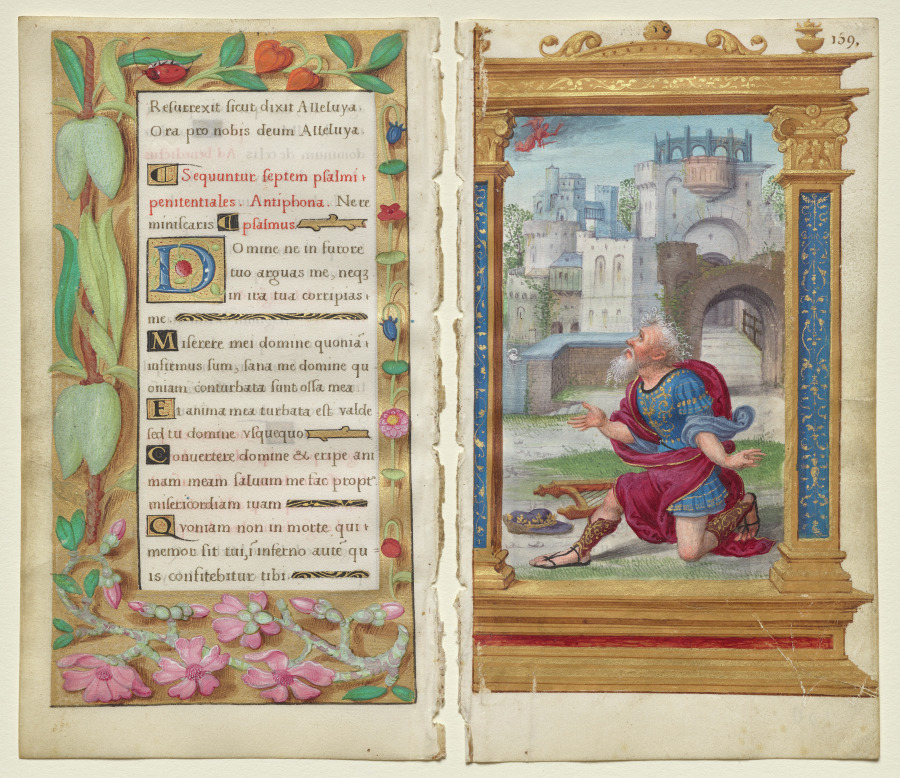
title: Adjoining Leaves from a Book of Hours: Penitential Psalms and King David in Prayer (2 of 3 Excised Leaves)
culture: France, 16th century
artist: Noël Bellemare (French, d. 1546)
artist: The 1520s Hours Workshop (French)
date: c. 1530–35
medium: ink, tempera, and liquid gold on vellum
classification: Manuscript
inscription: ...Resurrexit, sicut dixit, alleluia: Ora pro nobis Deum, alleluia. Sequuntur septem pfalmi penitentiales. Antiphona. Ne reminiscaris. psalmus: Domine , ne in durore tuo arguas me Miserere mei domine quoniam infirmus sum : sana me domine, quoniam conturbata sunt ossa mea Et anima mea turbata est valde : sed tu domine usquequo Convertere domine et eripe animam meam : salvum me fac propter misericordiam tuam. Quoniam non est in morte qui memor sit tui : in inferno autem quis confitebitur tibi.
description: These two adjoining leaves begin the penitential psalms, or holy poems recited to ask for forgiveness. An elderly King David is depicted kneeling in prayer after having committed great sins. He has cast his harp and hat to the ground as an expression of humility and looks up to the sky to ask forgiveness. The text of Psalm 6 begins with the large decorated initial D and reads, “Domine ne in furore tuo arguas me: neque in ira tua corripias me,” or “O Lord rebuke me not in thy indignation, nor chastise me in thy wrath.”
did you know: The seven penitential psalms were recited to ask for forgiveness; they coincide with the seven deadly sins.